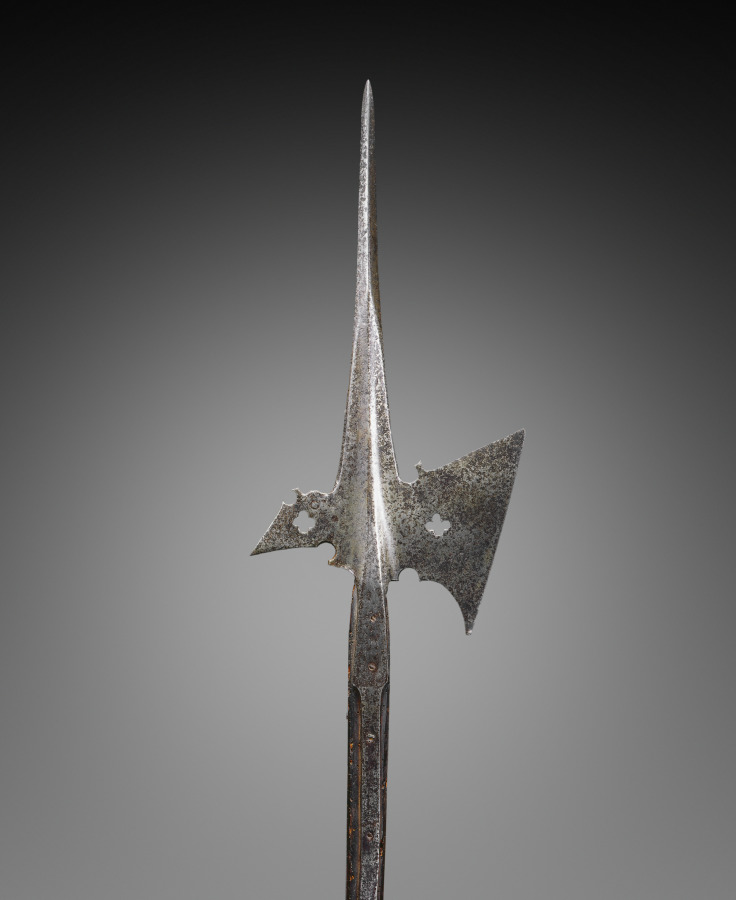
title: Halberd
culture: Germany (?)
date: c. 1500–1525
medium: steel, quatrefoil piercing; wood haft (rectangular with planed corners)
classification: Arms and Armor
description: The halberd was a staff weapon favored by European infantries (foot soldiers) of the 1400s and 1500s for its versatility and deadly effect. The word halberd comes from the German words Halm (staff) and Barte (axe). The halberd is, in fact, an axe that served multiple functions: the axe blade was used for hacking, the spike for thrusting, and the beak for piercing plate armor or for pulling a knight from his saddle. The halberd was used by shock troops (those who lead an attack) and by Swiss and German mercenaries. After about 1550, the halberd gradually became less functional. Its large blade provided space for coats of arms and insignia. By the late 1500s, the parade halberd had become a ceremonial weapon for palace guards.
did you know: Halberds could vary in length but most are around 6.5 feet.